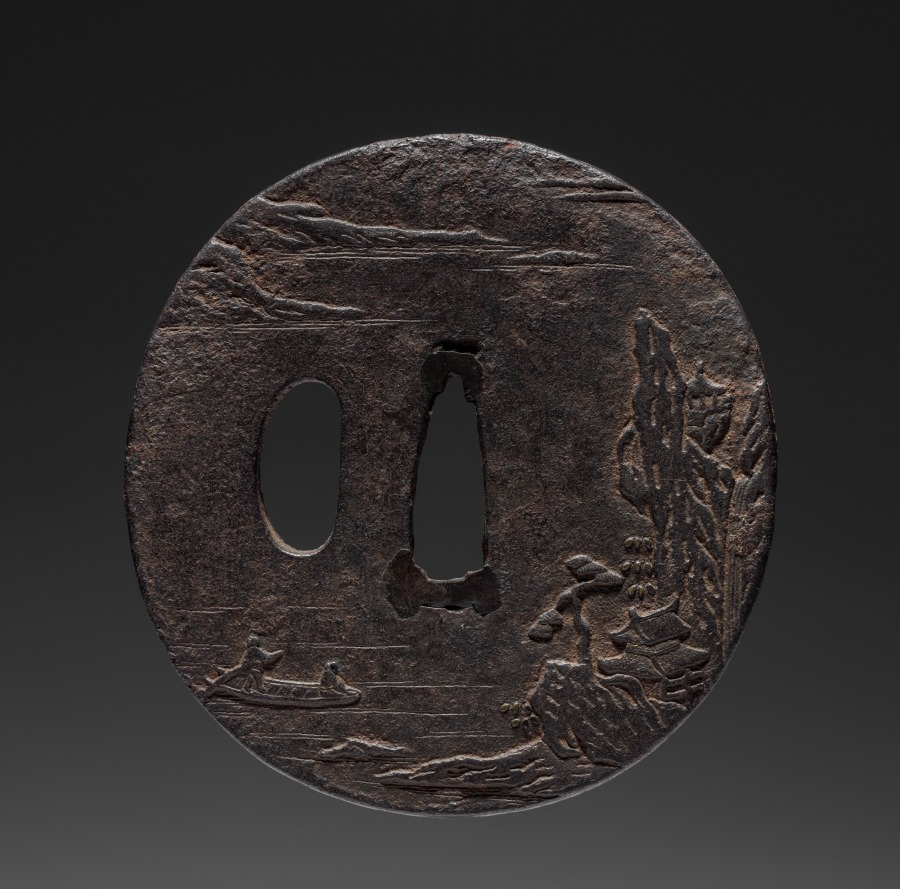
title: Sword Guard (Tsuba) with Chinese Landscape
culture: Japan, Edo period (1615–1868)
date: late 1600s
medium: iron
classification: Arms and Armor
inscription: signed "Jakushi."